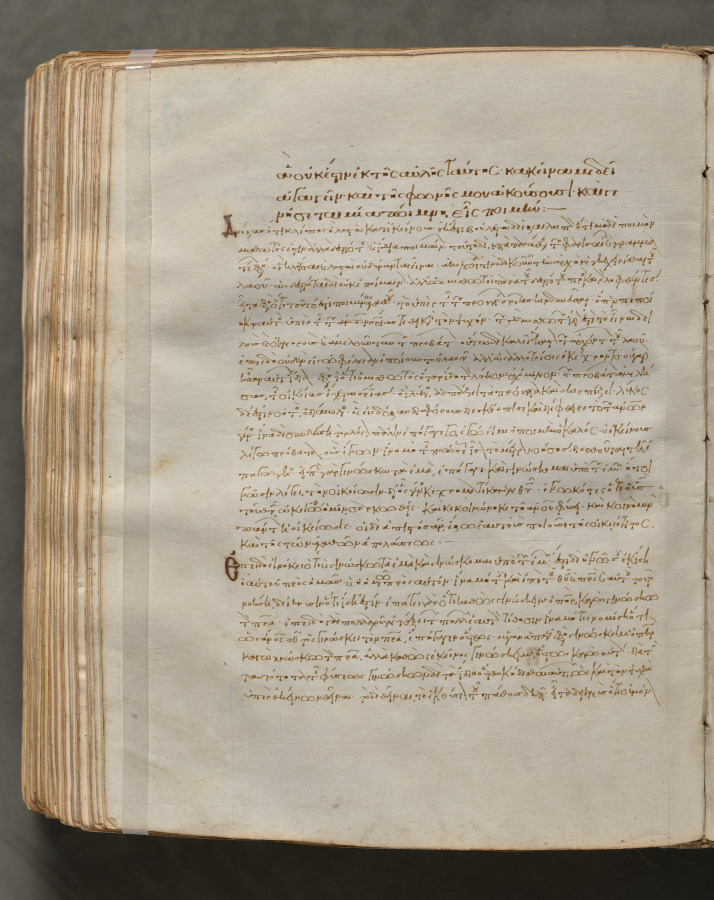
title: Text, folio 373 (verso), from a Gospel Book with Commentaries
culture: Byzantium, Constantinople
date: c. 1000–1100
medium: ink, tempera, and gold on vellum; leather binding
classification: Bound Volume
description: Each of the four gospels in this book opens on a page with brilliantly illuminated borders depicting the author of the text as well as birds—principally peacocks, symbols of the immortality of the soul—and fountains, representing the fountain of life and the salvation of the soul. This volume consists of 428 leaves with texts in Greek. Its level of sophistication suggests that it was probably written and decorated in a monastery in Constantinople.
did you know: Gospel books were carried in procession through Byzantine churches.